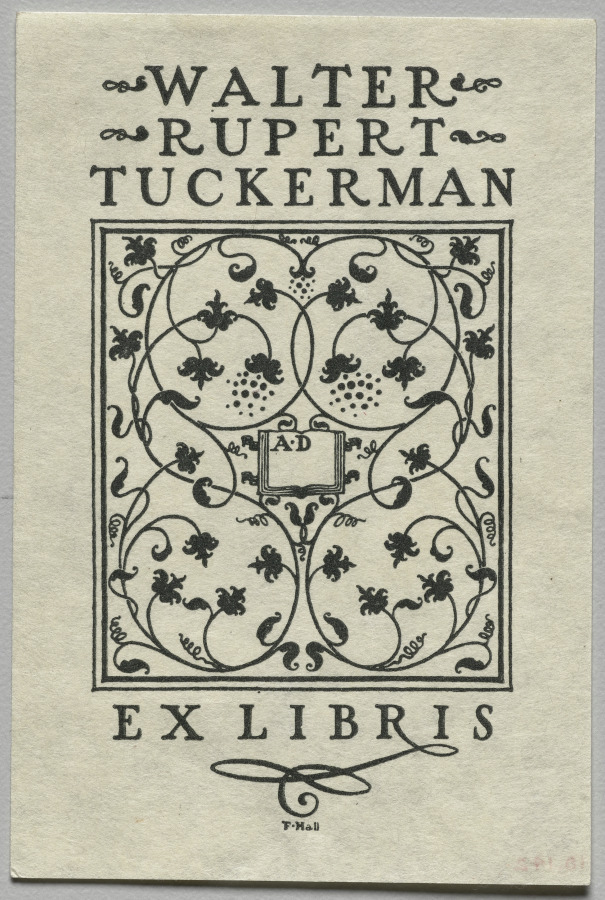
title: Bookplate: Walter Rupert Tuckerman, Ex Libris inscribed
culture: America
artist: Frederick Garrison Hall (American, 1879–1946)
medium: engraving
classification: Print